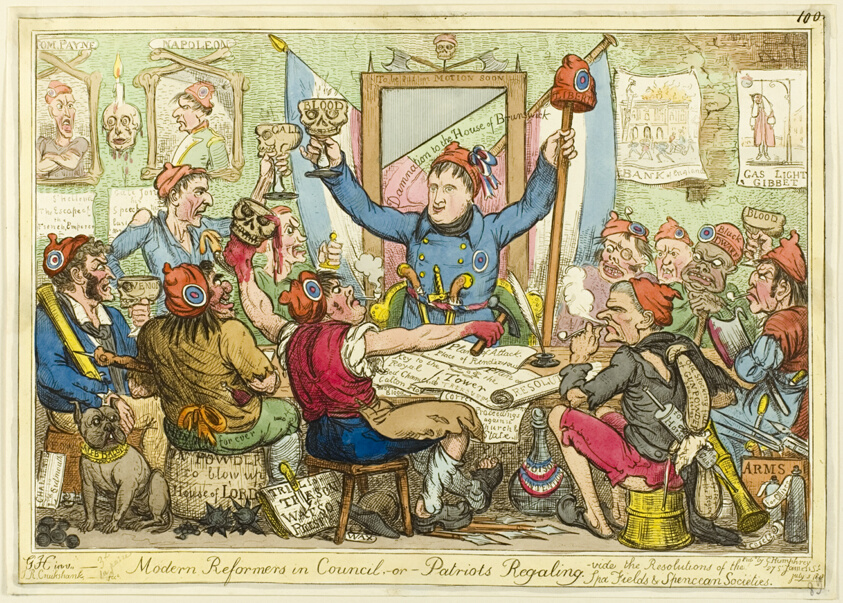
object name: Print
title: Modern Reformers in Council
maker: Isaac Robert Cruikshank (English, 1789-1856); after George Humphrey (English, c. 1773-1831); published by George Humphrey (English, c. 1773-1831)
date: published July 3, 1818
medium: Hand-colored etching on paper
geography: England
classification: etching; print; prints and drawing